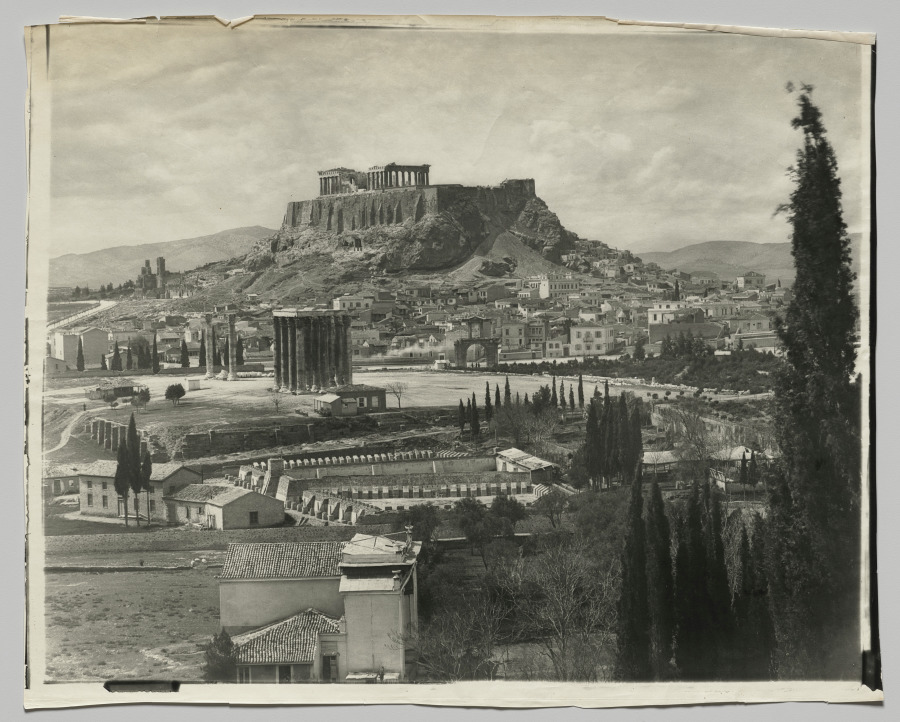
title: View of the Acropolis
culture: France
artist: Adolphe Braun & Co. (French, 1845–1894)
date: c. 1880s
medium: mammoth carbon print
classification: Photograph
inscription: Written in pencil on verso: "Acropole"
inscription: Written in pencil on verso: "78"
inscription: Written in pencil on verso: "D"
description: Adolphe marketed his photos of flowers, artworks, landscapes, and monuments from across Europe throughout that continent and in North America. The Acropolis of Athens, the most famous ancient Greek site, must have sold well; Braun offered multiple views of it. The image on a carbon print is formed from pigmented gelatin, which is far more resistant to fading than the silver or metal salts in silver-based prints.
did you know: Carbon prints are among the stable and long-lasting photographic processes.